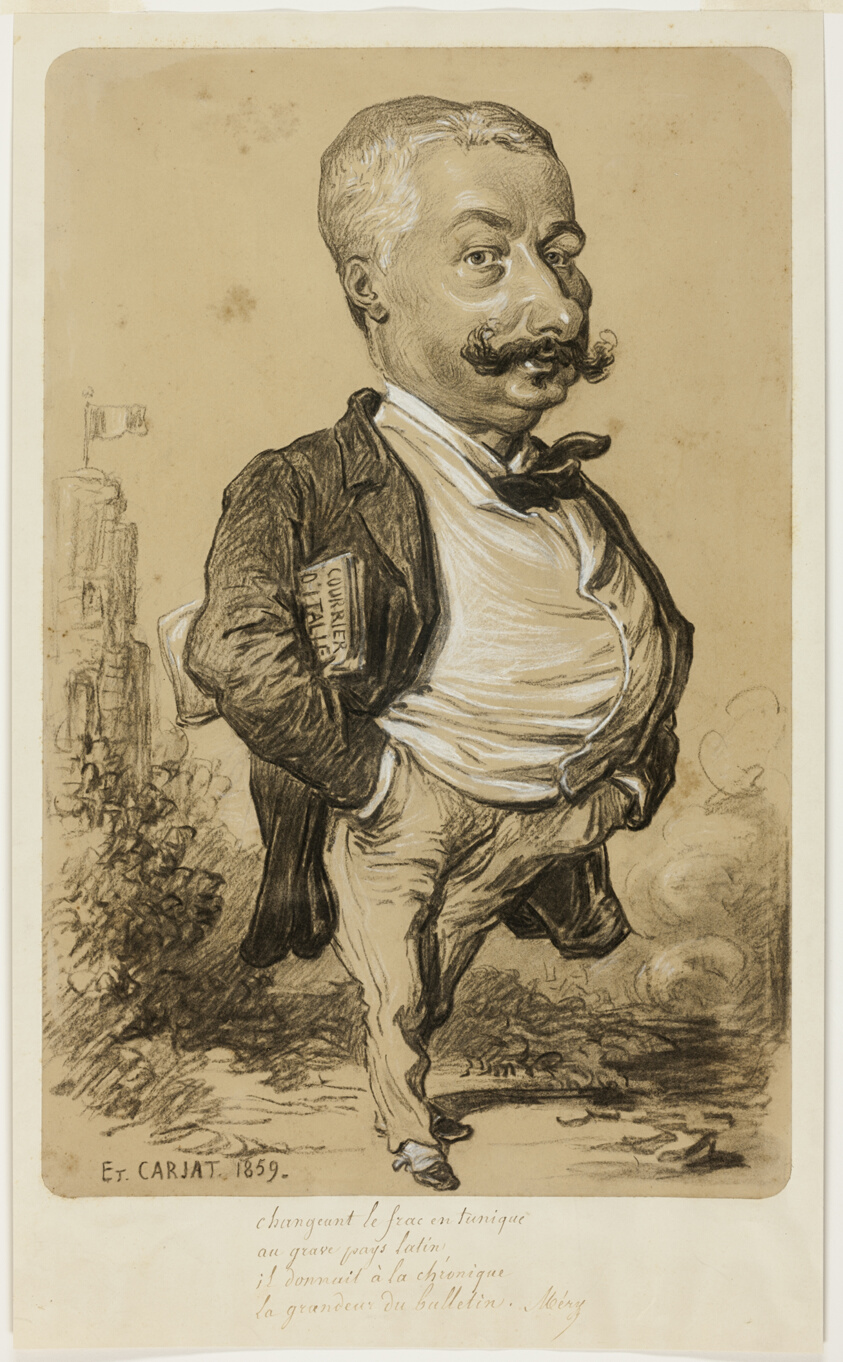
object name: Drawing and Watercolor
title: Caricature of a Man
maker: Etienne Carjat (French, 1828–1906)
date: 1859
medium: Charcoal, heightened with white chalk, on tan wove paper, laid down on ivory wove paper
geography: France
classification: charcoal; paper; prints and drawing